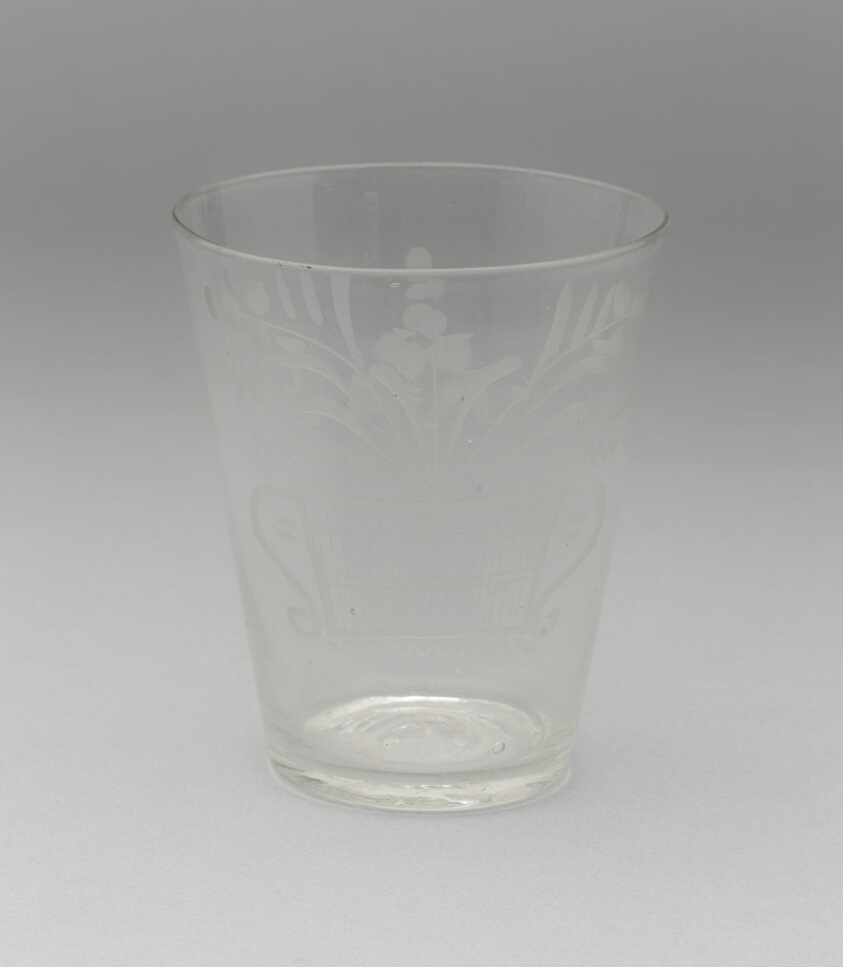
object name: Glass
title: Tumbler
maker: American Flint Glass Manufactory; American, 1764–1774; Manheim, Pennsylvania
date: 1764–74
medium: Glass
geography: Manheim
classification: drinking vessel; glass; american decorative arts; european decorative arts; decorative arts